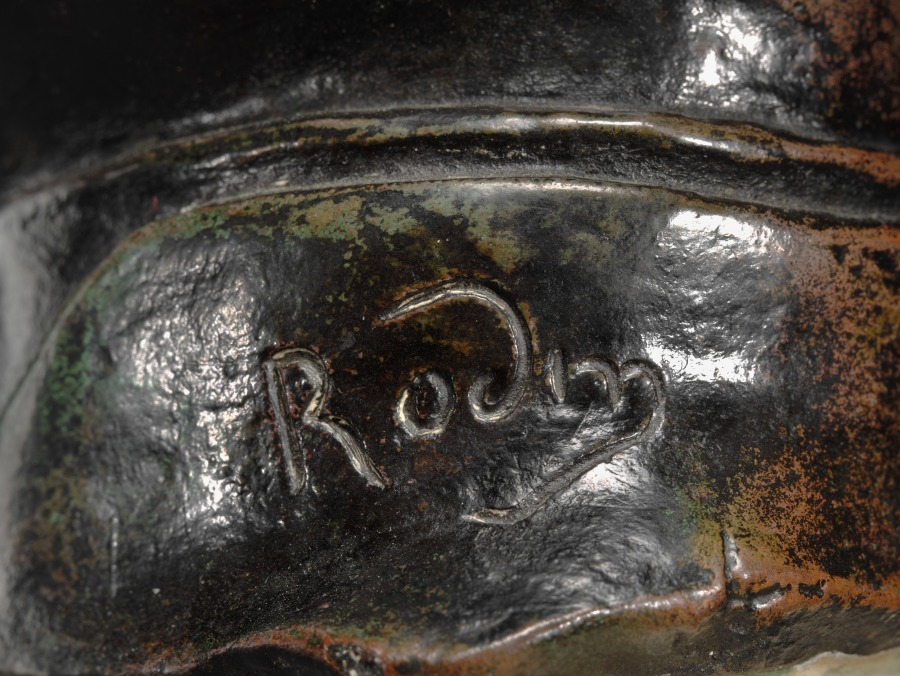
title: Father Pierre-Julien Eymard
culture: France, 19th century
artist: Auguste Rodin (French, 1840–1917)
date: ca. 1863 (original model)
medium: bronze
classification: Sculpture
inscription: Signed on left side of collar: "Rodin"; on base, back right: "A. Rodin"